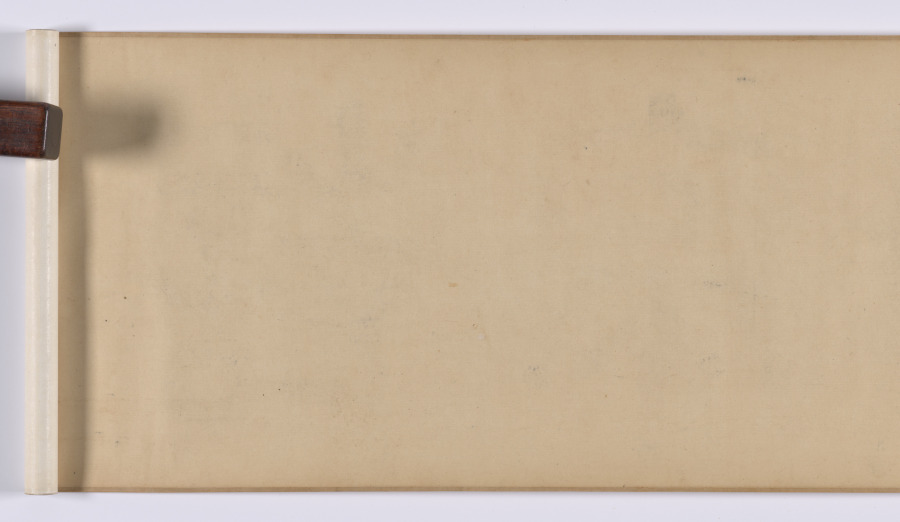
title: Poetic Feeling in a Thatched Pavilion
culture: China, Yuan dynasty (1271-1368)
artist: Wu Zhen (Chinese, 1280–1354)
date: 1347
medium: handscroll; ink on paper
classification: Painting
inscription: 依村構草亭，端方意匠宏。 林深禽鳥樂，塵遠竹松輕。 泉石俱延賞，琴書悅性情。 何當謝凡近，任適慰平生。 至正七年丁亥冬十月，為元澤戲作草亭詩意。梅沙彌書 [印]楳華盦; 嘉興吳鎮仲圭書畫記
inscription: 我愛梅花翁，巨老傳心印。 脩此水墨缘，種種得蒼潤。 樹石墮筆鋒，造化不能吝。 而今橡林下，我願執掃汛。 後學沈周 [印]启南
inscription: Colophon by Chen Rentao (1952): 予求梅道人畫二十年不可得。所見多膺鼎，即故宮所藏山水數軸都不可靠。傳世真迹，惟《漁父圖》、《嘉禾八景》與此《草亭詩意》而已。壬辰十月十四日余大病初愈，居家休養，研山師忽持此圖相贈。展卷披覽，頓覺精神沛振，如服僊藥。同日又得宋拓柳公權《神策軍紀聖德碑》，及群玉堂藏《真草書千(字)文》，皆海內孤本。一日得數寶，欣喜何如，書以志幸。 陳仁濤識 [印]陳氏仁濤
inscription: Colophon by Chen Rentao: 此圖作於至正七年丁亥，時年六十八，盖其晚年神品也。 濤又識 [印]陳仁濤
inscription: Title on frontispiece by Li Dongyang 李東陽 (1447-1516).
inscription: 33 additional seals: 1 seal of Li Chao-heng 李肇亨 (1592-1664)：檇李李肇亨書畫記; 9 seals of Liang Qingbiao 梁清標 (1620-1691): 蒼巖子、蕉林、蕉林梁氏書畫之印、蕉林秘玩、蕉林書屋、蕉林玉立氏圖書、棠邨 (appears twice)、棠邨審定; 1 seal of Wang Yirong (1845-1900): 懿榮; 3 seal of Li Yanshan (1898-1961): 雙銕笛樓 (appears twice)、硯山心賞; 12 seals of Chen Rentao 陳仁濤（1906-1968）：陳氏仁濤、陳仁濤珍藏印、金匱寶藏·陳氏仁濤 (appears three times)、金匱秘笈、金匱室、金匱室精鑒璽 (appears twice)、金匱室主、金匱神品、仁濤奇緣; 1 seal: 崐溟居士; 1 seal: 林止在㭯生圖書印; 3 seals unidentified.